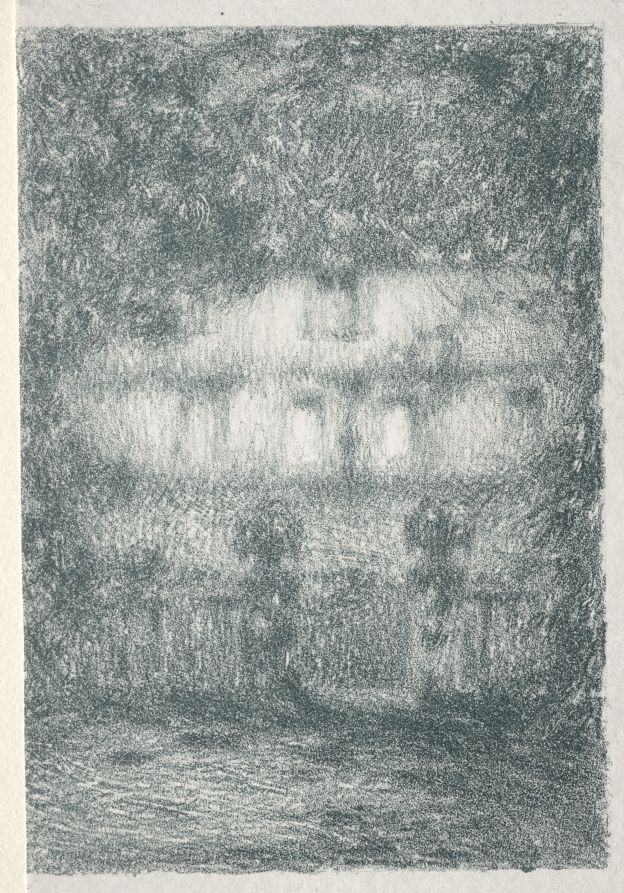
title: The House in Moonlight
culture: France, 20th century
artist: Henri Le Sidaner (French, 1862–1939)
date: 1909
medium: lithograph printed in green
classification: Print